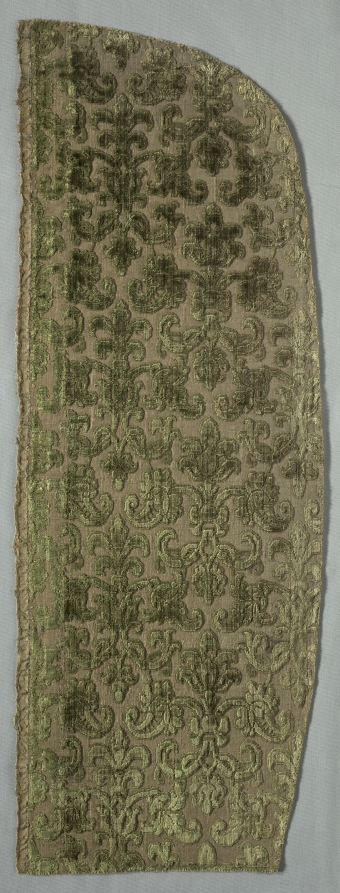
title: Velvet Fragment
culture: Italy, early 17th century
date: early 1600s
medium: velvet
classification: Velvet